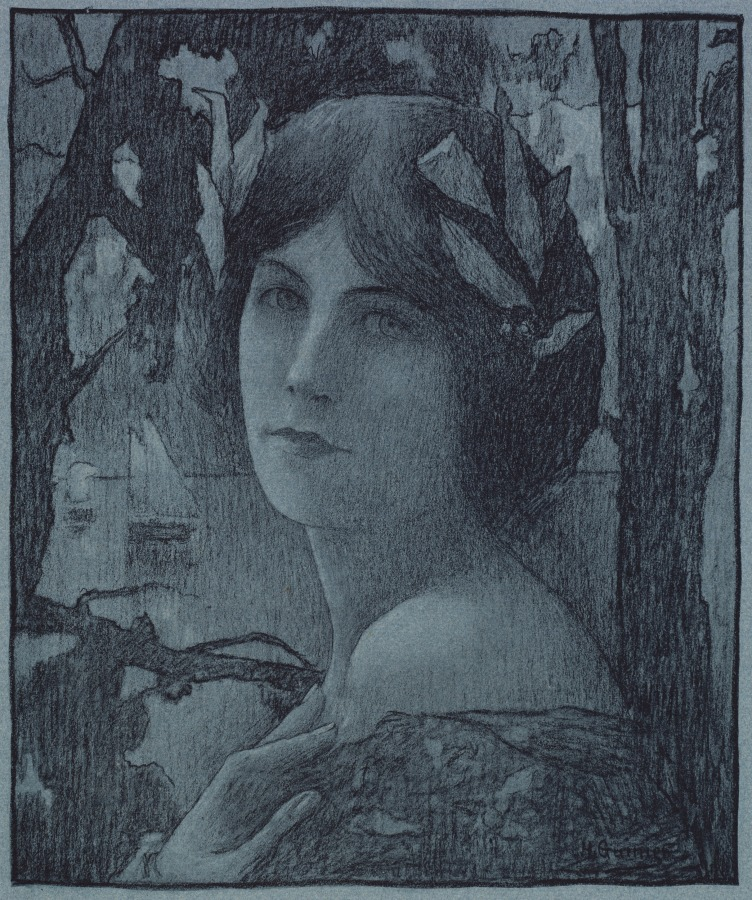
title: Gentle Night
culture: France, 19th century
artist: Henri-Jules Guinier (French, 1867–1927)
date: 1899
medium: lithograph on blue paper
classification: Print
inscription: Also included: original tissue paper that was issued with print with text: Nuit Douce / Henri Guinier / ESTAMPE EN COULEURS, ORIGINALE, INÉDITE, Exécuté spécialement par l'artiste pour l'Estampe moderne. / Text of poem, Chanson de Bretagne by Anatole Le Braz Published in L'Estampe Moderne, no. 21, January 1899